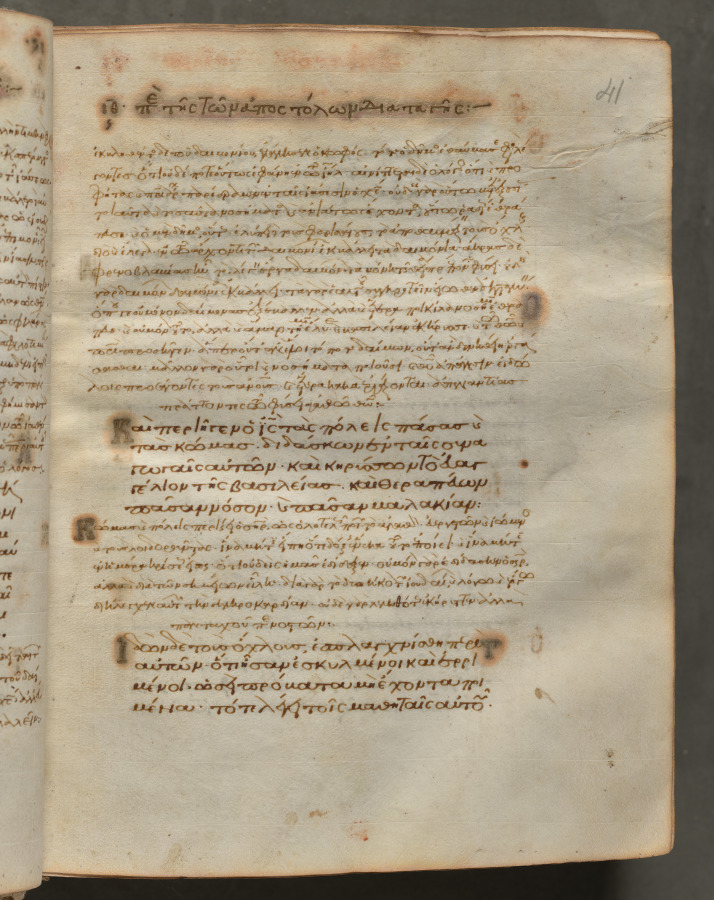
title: Text, folio 41 (recto), from a Gospel Book with Commentaries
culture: Byzantium, Constantinople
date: c. 1000–1100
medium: ink, tempera, and gold on vellum; leather binding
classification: Bound Volume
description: Each of the four gospels in this book opens on a page with brilliantly illuminated borders depicting the author of the text as well as birds-principally peacocks, symbols of the immortality of the soul-and fountains, representing the fountain of life and the salvation of the soul. This volume consists of 428 leaves with texts in Greek. Its level of sophistication suggests that it was probably written and decorated in a monastery in Constantinople.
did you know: Gospel Books were carried in procession through Byzantine churches.